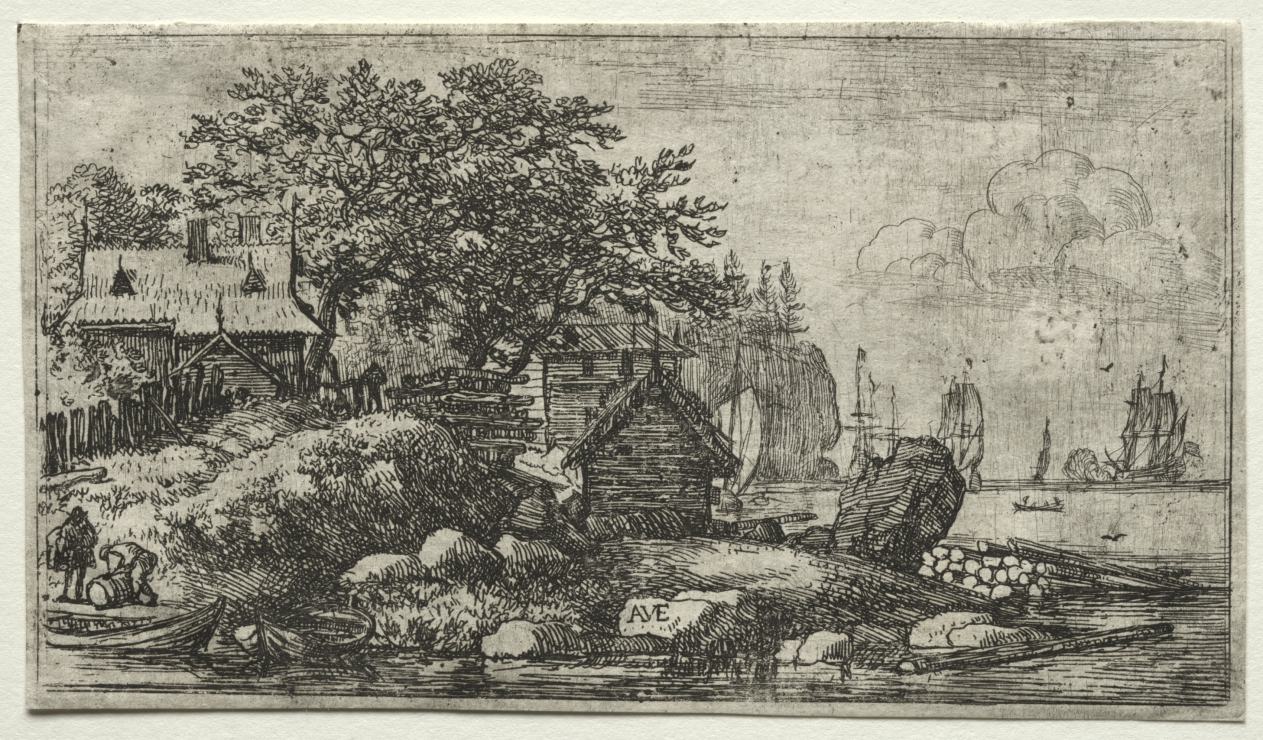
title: Eight landscapes (H.57-64): Landscape with Two Empty Boats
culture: Netherlands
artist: Allart van Everdingen (Dutch, 1621–1675)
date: 1936–75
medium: etching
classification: Print